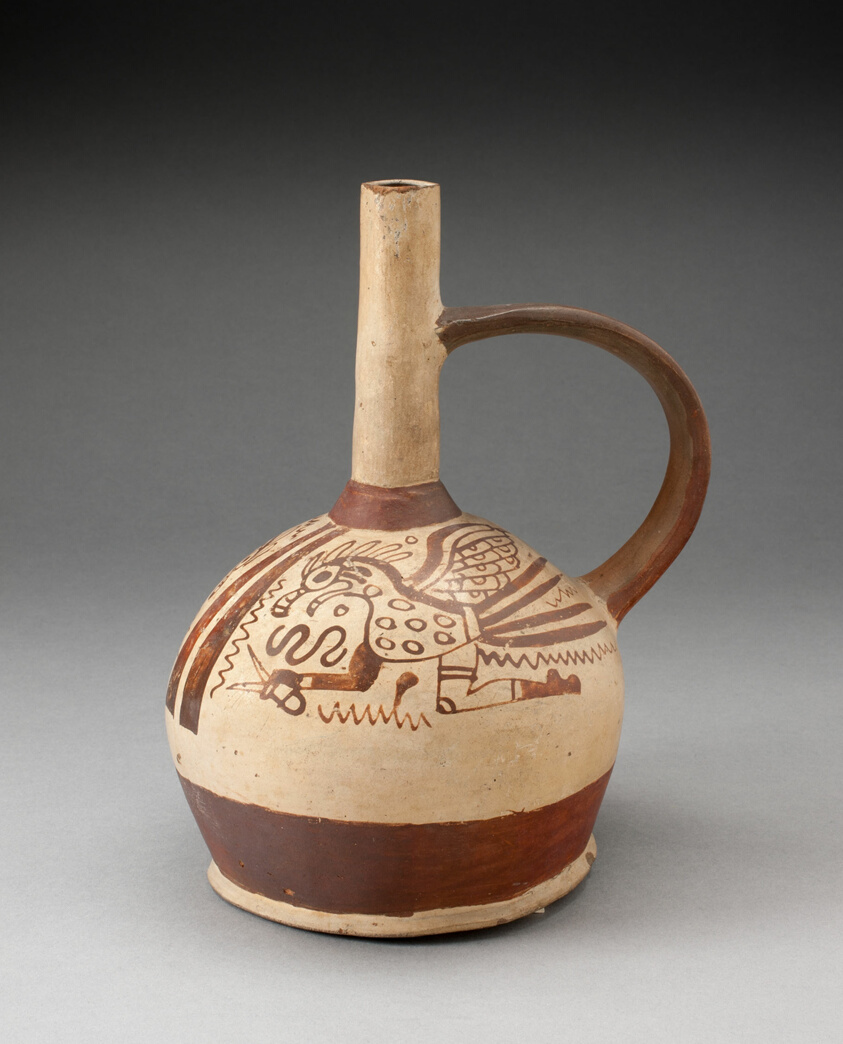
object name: Vessel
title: Handle Spout Vessel with Fineline Bird Motifs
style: moche, mochica v, mochica, early intermediate period, Pre-Columbian, americas, Arts of the Americas, andean, andes, south american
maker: Moche (North coast, Peru)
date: 100 BCE–500 CE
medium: Ceramic and pigment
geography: Peruvian North Coast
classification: earthenware; ceramics; vessel; art of the americas